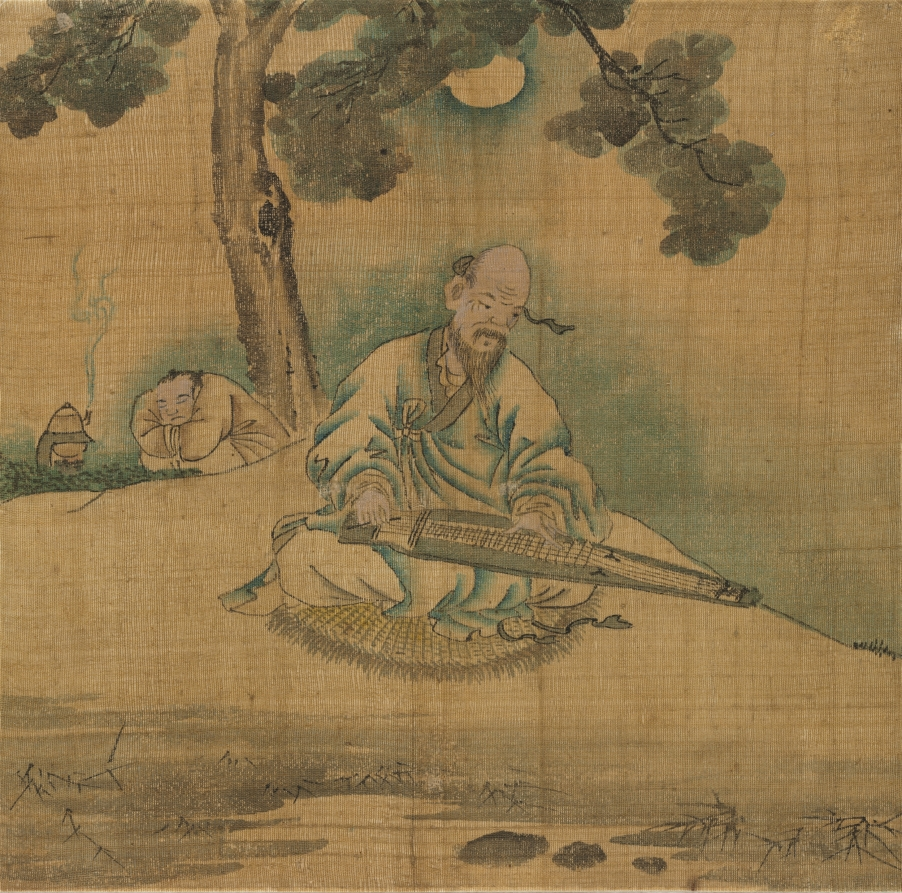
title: Scholar Playing a Qin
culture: Korea, Joseon dynasty (1392–1910)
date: 1800s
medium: album leaf; ink and color on silk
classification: Painting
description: The painting invites viewers to an intimate qin, or zither, recital in the cool breezy night under the moon. The musician at the center gently strums the strings, while his servant boy is drowsing, without realizing the tea pot is steaming. In older times, playing a musical instrument was considered an effective way to cultivate one's spiritual and mental balance.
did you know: The Korean zither with six strings, depicted in this painting, was often played by men.